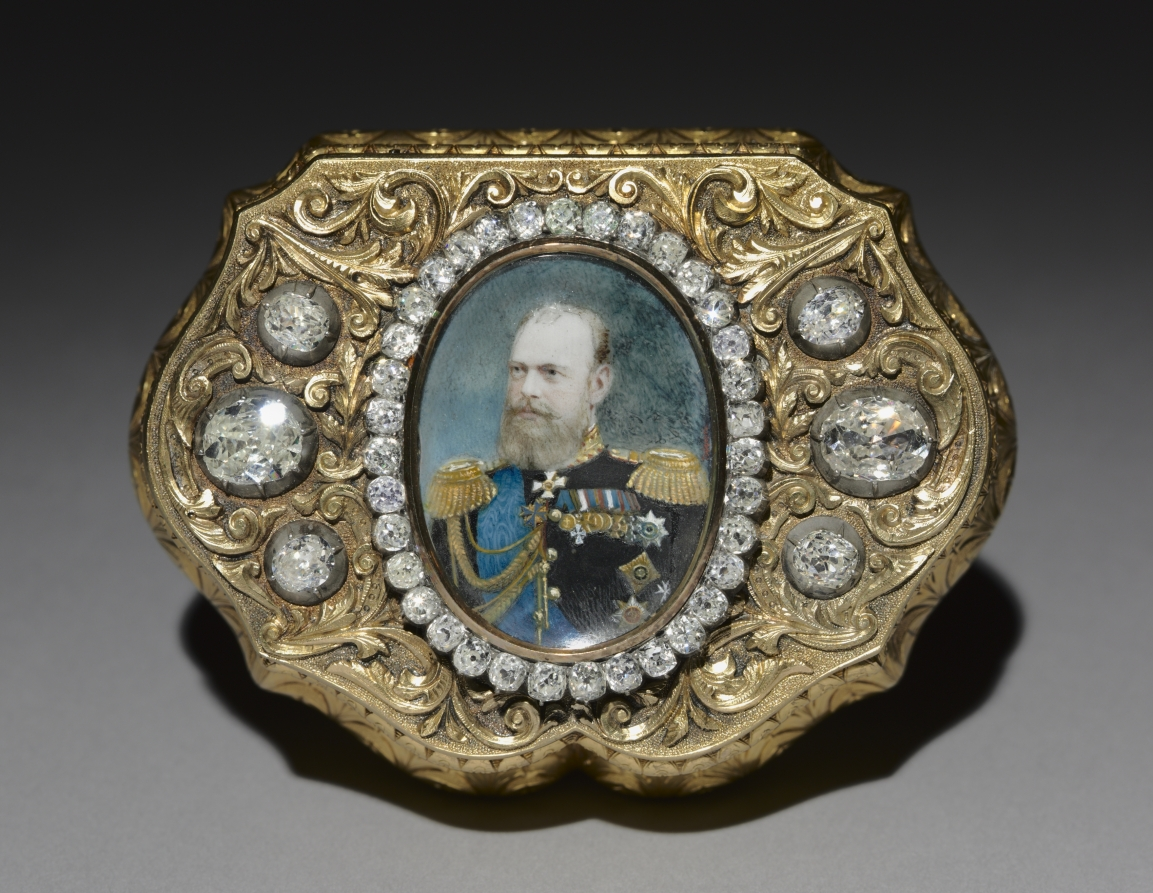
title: Box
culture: Switzerland, Neufchatel, 19th century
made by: Goffert (Russian)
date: c. 1850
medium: gold set with diamonds around a miniature of Tsar Alexander III (1845-1894)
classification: Miscellaneous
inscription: miniature signed in Russian: " " (Goffert).